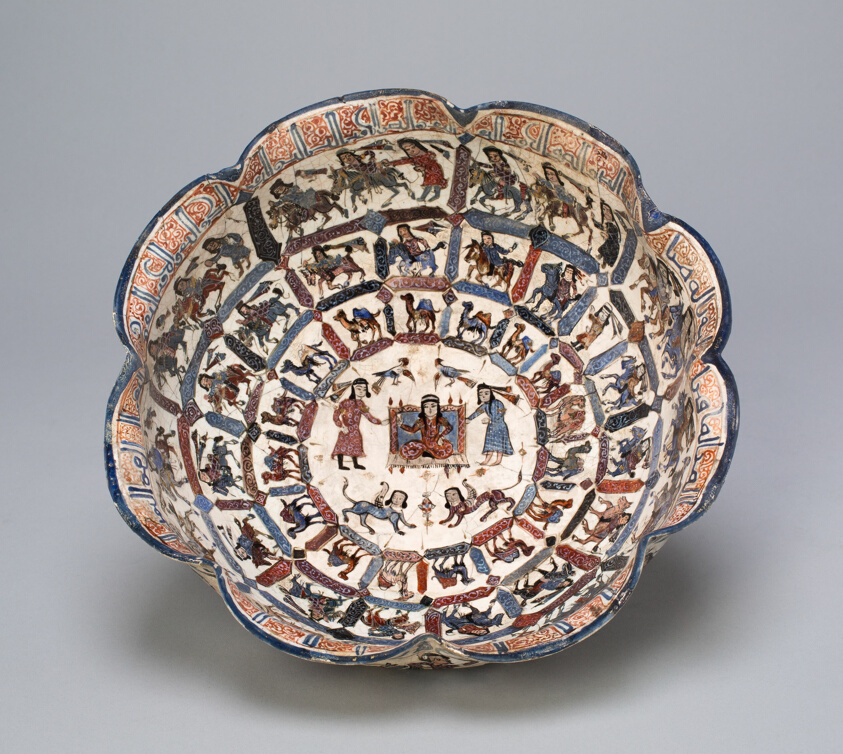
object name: Ceramics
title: Mina'i Lobed Bowl with a Seated Prince and Mythical Creatures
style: Islamic (culture or style)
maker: Iran; Kashan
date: Seljuq dynasty (1037–1194), Late 12th/early 13th century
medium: Mina'i ware, fritware with polychrome painting over an opaque white glaze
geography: Iran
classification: bowl; dish (vessel); asian art; ceramics; vessel